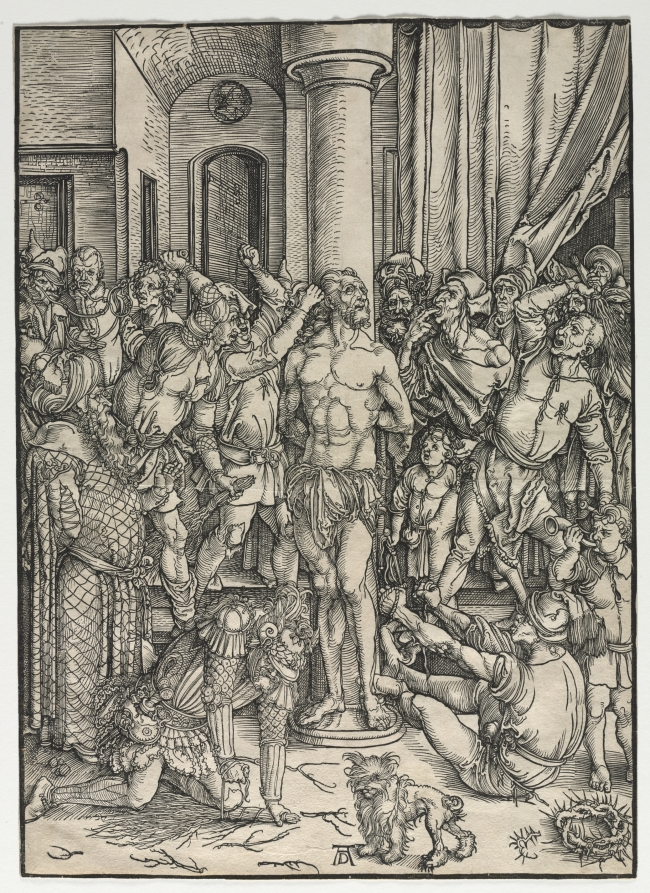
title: The Great Passion: The Flagellation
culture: Germany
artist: Albrecht Dürer (German, 1471–1528)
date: c. 1497–1510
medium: woodcut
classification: Print